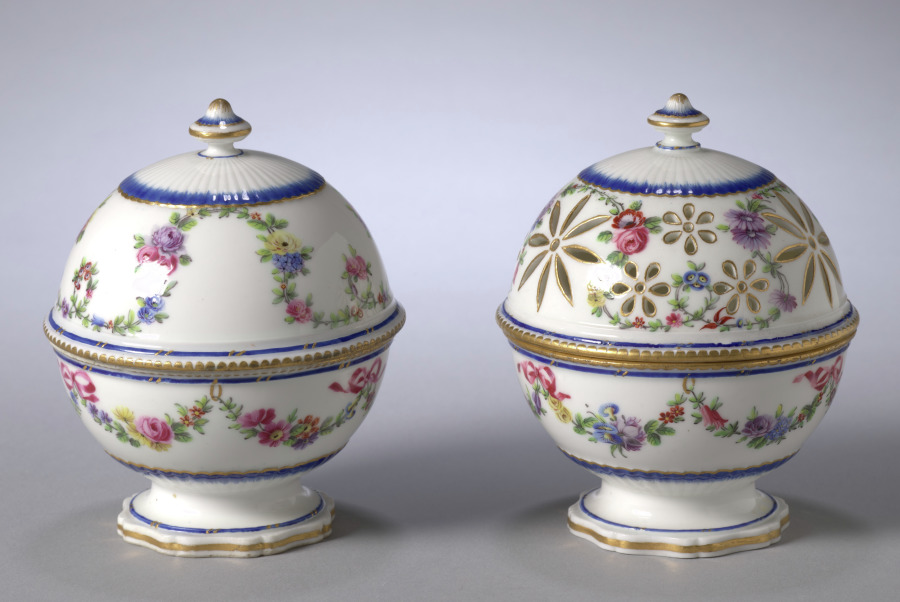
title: Soap Box and Sponge Box Set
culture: France, Sèvres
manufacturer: Sèvres Porcelain Factory (French, est. 1756)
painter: Antoine-Toussaint Cornaille (French, 1735–1812)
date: 1769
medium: soft-paste porcelain with enamel and gilt decoration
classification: Ceramic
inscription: [Interlaced 'L's below three dots in a line with the date letter 'Q' (1953.635.2)]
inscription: [Painter's mark of Antoine-Toussaint Cornaille(s), in the form of a crochet or quaver]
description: In 18th-century France the toilette, an elaborate dressing ceremony practiced by both men and women, became increasingly ritualized and public, creating a demand for matching containers and implements like this soap and sponge box. The box with the lid pierced in floral patterns would have been used to carry the sponge.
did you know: The first recorded sale of a boîte d’éponge was to Louis XV in September of 1767.